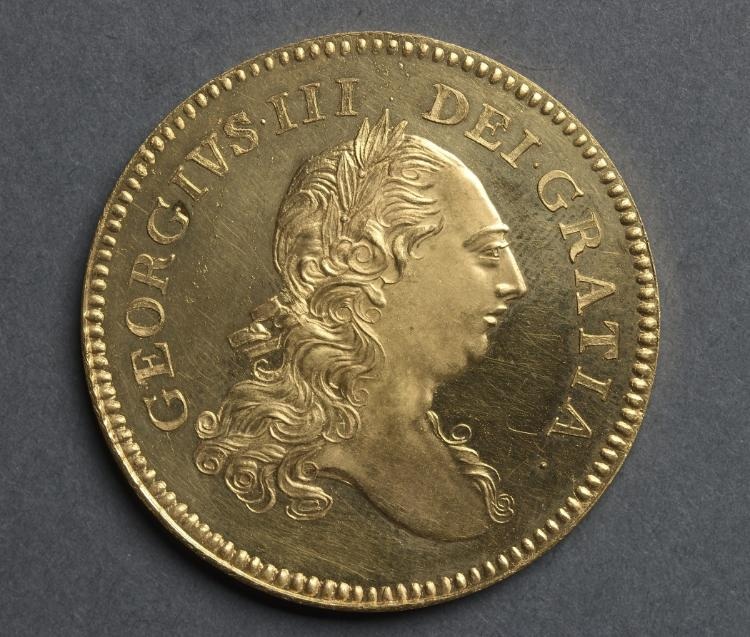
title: Five Guineas: George III (obverse)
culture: England, George III, 1760-1820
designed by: Richard Yeo (British, 1720–1779)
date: 1777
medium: gold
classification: Coins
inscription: DEI . GRATIA . GEORGIVS . III.